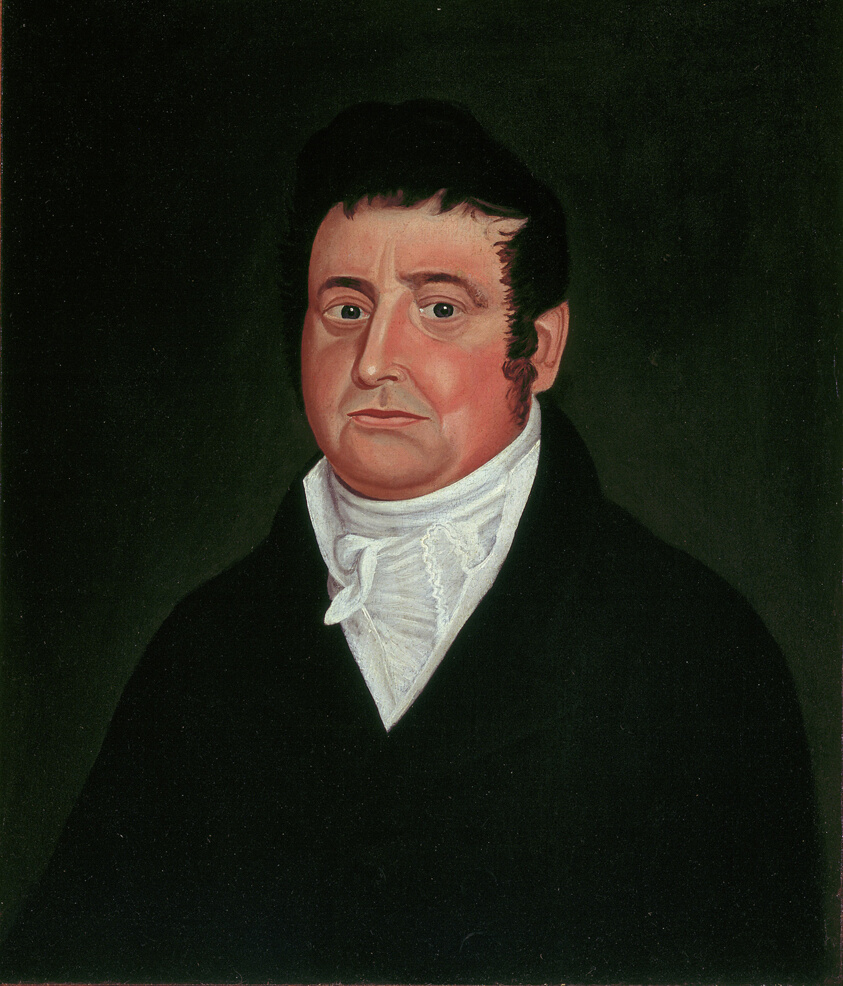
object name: Painting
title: Man in Black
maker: Artist unknown (American, 19th century)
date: 1820–40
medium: Oil on canvas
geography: United States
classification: painting; american arts